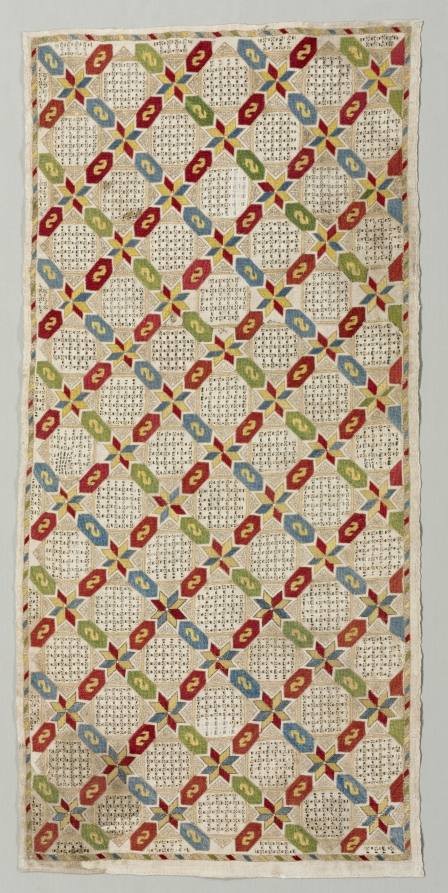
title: Pillow Cover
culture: Greece, Cyclades Islands, Naxos, 18th-19th century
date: 1700s - 1800s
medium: embroidery: silk on linen tabby ground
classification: Embroidery